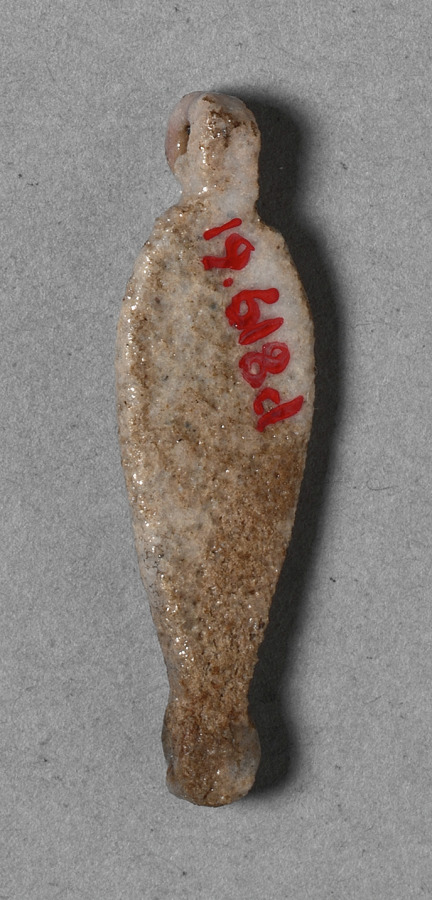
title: Petal-Shaped Bead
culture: Egypt, New Kingdom (1540–1069 BCE), Dynasty 18, reign of Amenhotep III (1390–1352 BCE)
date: c. 1391–1353 BCE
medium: faience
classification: Jewelry